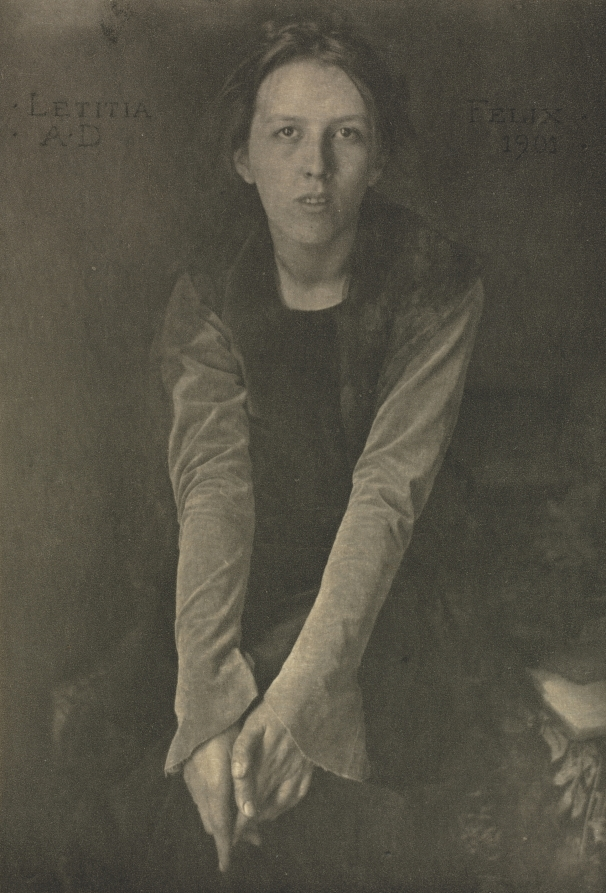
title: Camera Work: Letitia Felix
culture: America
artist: Clarence H. White (American, 1871–1925)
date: 1903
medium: photogravure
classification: Bound Volume